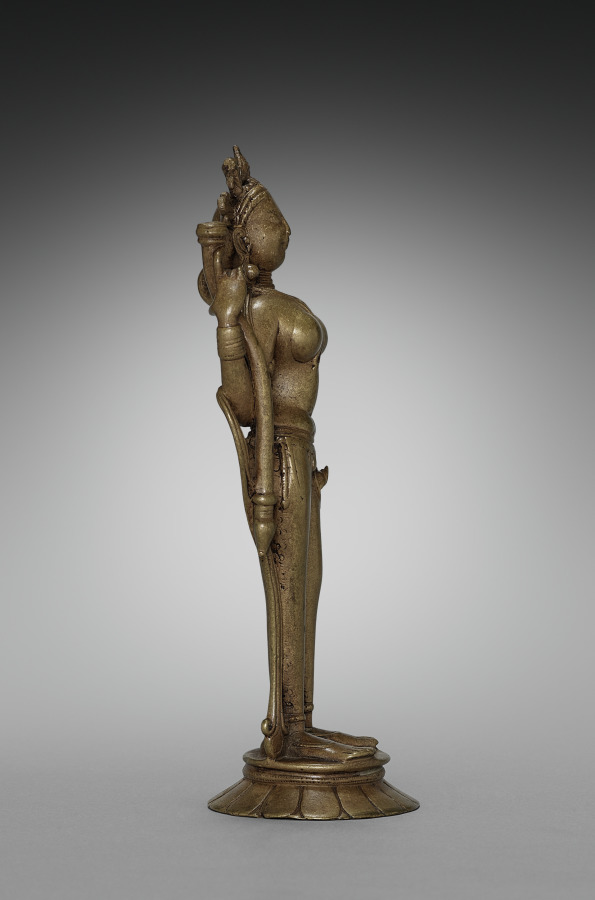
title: Standing Devi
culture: India, Ladakh, 12th century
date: 1100s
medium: brass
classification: Sculpture